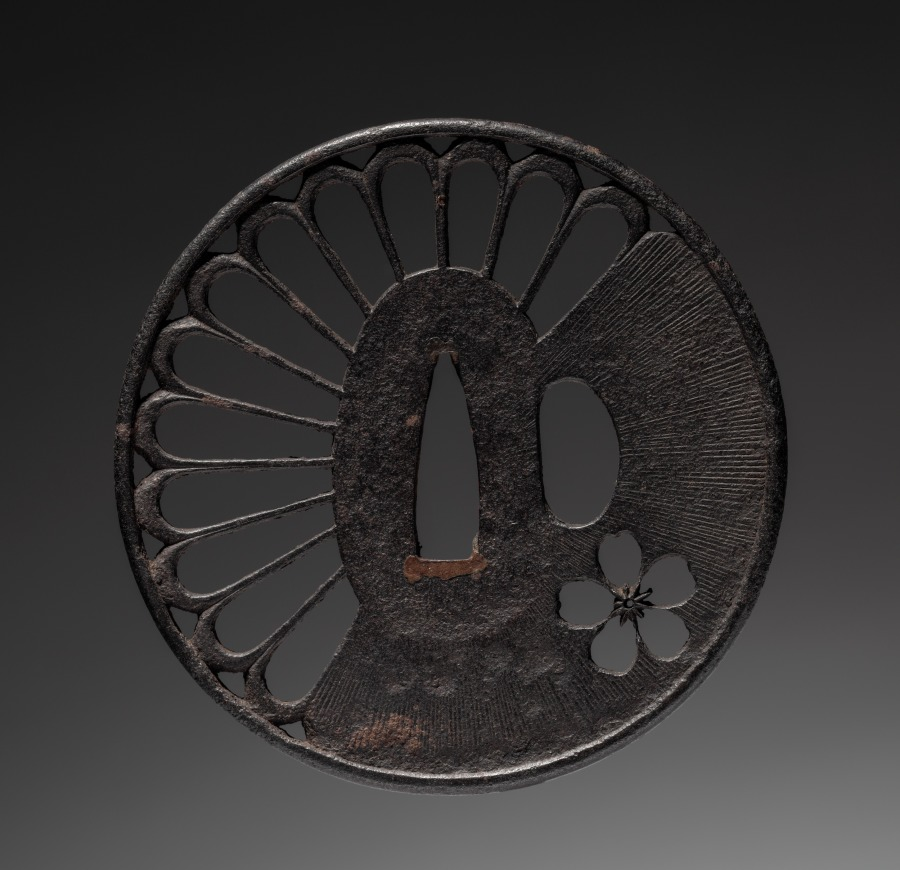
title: Sword Guard (Tsuba)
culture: Japan, Edo period (1615–1868)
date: 1615–1868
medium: iron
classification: Arms and Armor